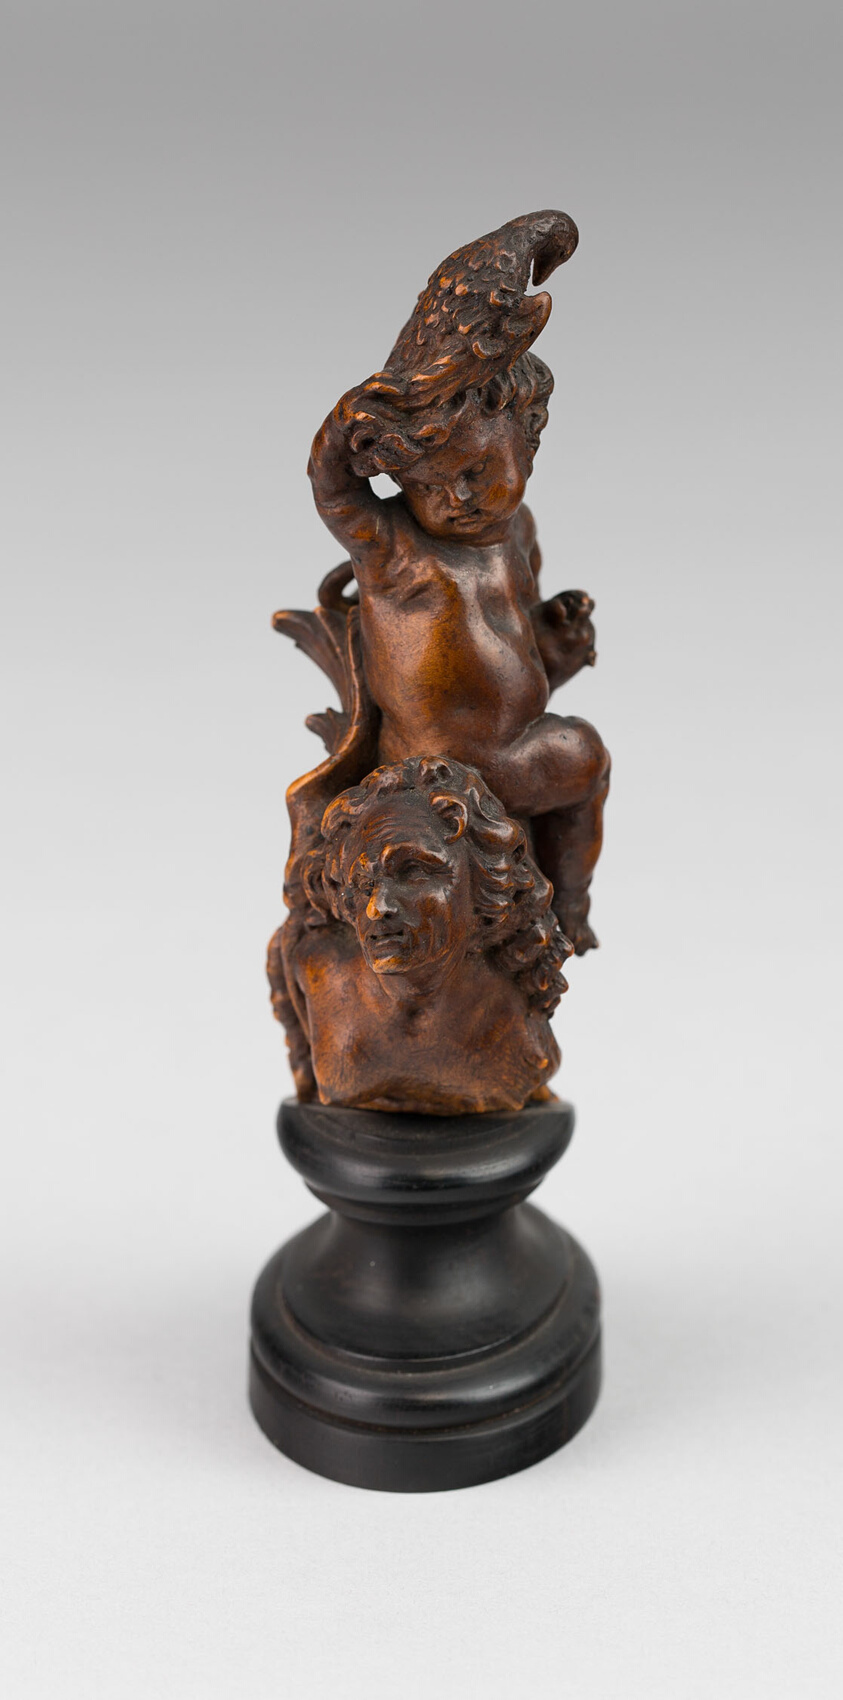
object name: Sculpture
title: Putto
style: 18th Century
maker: South German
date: 1740/60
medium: Boxwood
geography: Germany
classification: statuette; sculpture; german; sculpture/wood; wood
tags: putti, children, child, bird, head, woman